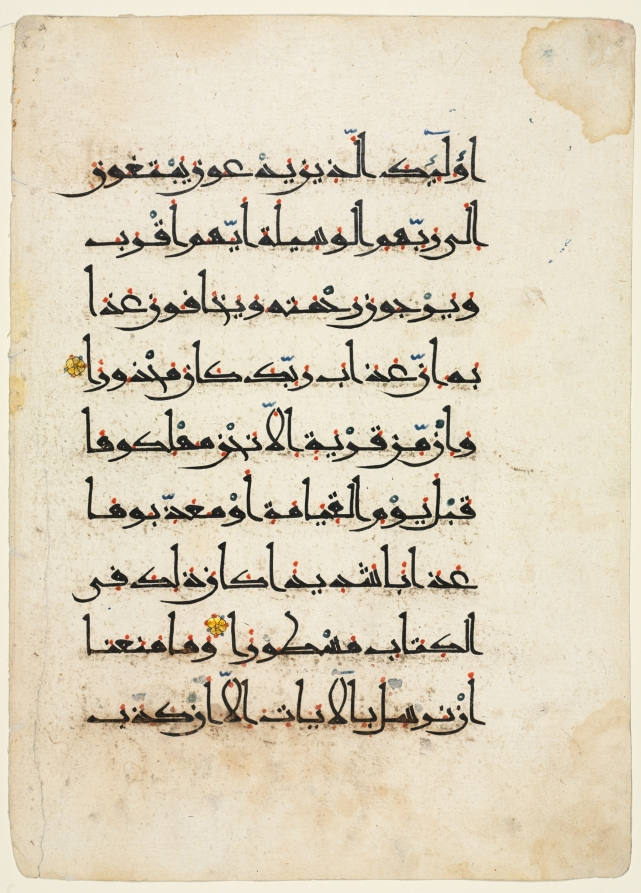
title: Leaf from a Qur'an (verso)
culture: Egypt ?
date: 1000s-1100s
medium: ink, gold, and colors on paper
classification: Drawing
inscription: Sura al-Isra' [Chapter: The Israelites] (17: 57–part 59) (Arabic) Script: Eastern Kufi (nine lines to a page)